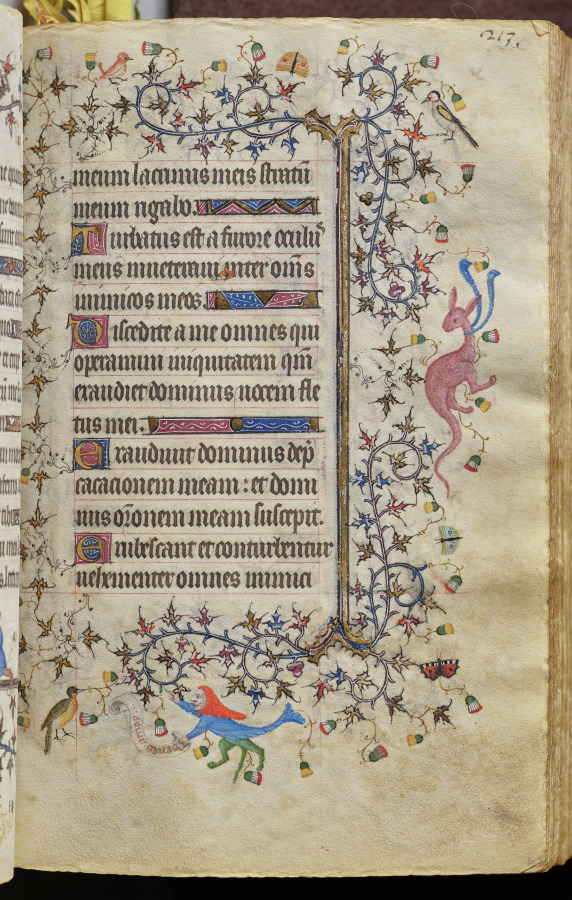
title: Hours of Charles the Noble, King of Navarre (1361-1425): fol. 107r, Text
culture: France, Paris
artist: Master of the Brussels Initials and Associates (French)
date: c. 1405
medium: ink, tempera, and gold on vellum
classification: Bound Volume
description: This precious volume was obviously highly prized by its owner, the French-born King of Navarre, who had his coat of arms painted on no less than twenty folios. Rather than directly commissioning this manuscript from a specific workshop, it seems that Charles the Noble acquired his book of hours -- perhaps ready-made for the luxury market -- while on a trip to Paris in 1404-05. A collaborative effort, six painting styles are evidenced within the pages of this codex, those of two Italians, two Frenchmen, and two Netherlanders. The painter who was responsible for the planning and decoration of the book, and who produced seventeen of the large miniatures, was a Bolognese artist known as the Master of the Brussels Initials. His principal assistant, responsible for most of the borders, was a Florentine who signed his name "Zecho" da Firenze on folio 208 verso.